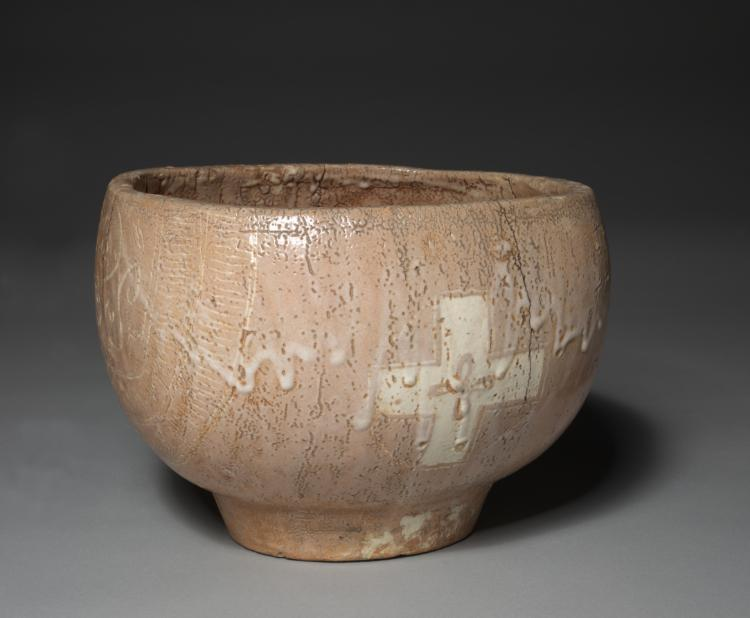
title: Baptismal Bowl with Christian Design of Cross and Insignia of the Society of Jesus: Hagi Ware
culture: Japan, Momoyama period (1573–1615)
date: c. 1600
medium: glazed stoneware, Waridawara type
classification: Ceramic